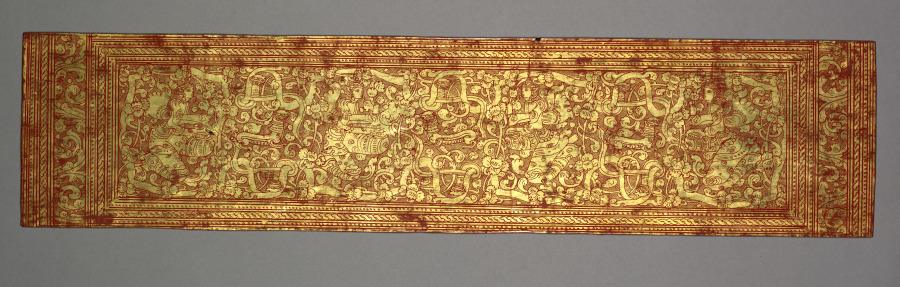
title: Bottom cover from a Kammavacha: Buddhist Ordination Text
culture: Myanmar (Burma)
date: 1800s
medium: Cover: lacquer, gilding, and glass appliqué on wood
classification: Manuscript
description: In premodern Burma, lay people commissioned lavishly ornamented manuscripts for ceremonial occasions, when officiants would read aloud from the text. Written in black lacquer, the text is in the language of Pali written in a Burmese script. It contains ordination rites and procedures for monastic ceremonies. The second to last page is covered with intricately drawn, winged celestial beings (nats) in gestures of praise. They fly amid intertwining vegetation—denoting bounty—that grows from serpentine forms that refer to rain clouds. Lionlike forms inhabit the space with them. The top and bottom covers are equally ornamented with jeweled floral patterning.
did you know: The Pali text of this manuscript is written in Burmese square script, which is also known as "tamarind seed script."